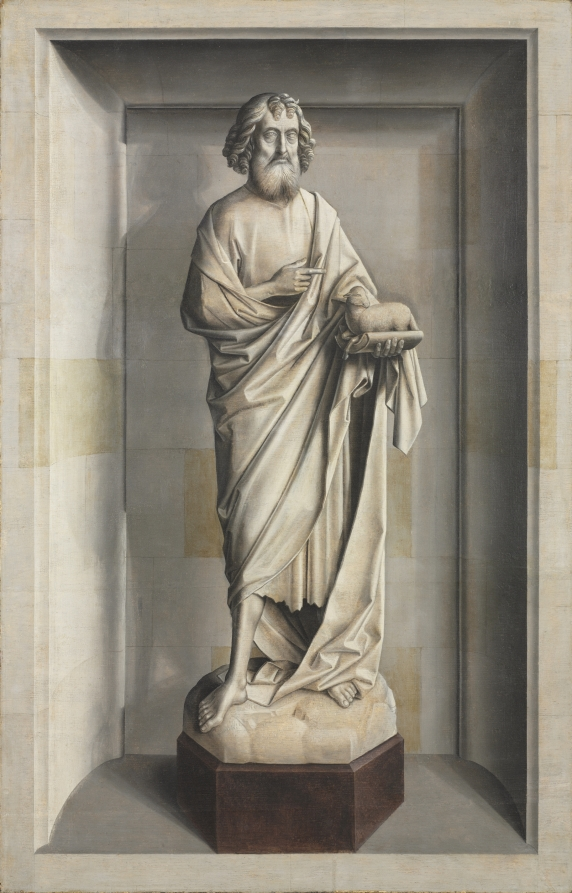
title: Saint John the Baptist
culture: Netherlands, Leuven, 15th century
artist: circle of Dieric Bouts (Netherlandish, 1415–1475)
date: c. 1475–85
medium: oil on wood (grisaille)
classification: Painting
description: This panel once formed part of an altarpiece painted for the Church of Saint Laurentius in Cologne. It originally comprised the reverse of the arrest of Christ, now in the Alte Pinakothek in Munich. Another grisaille panel representing Saint John the Evangelist, also in Munich, formed the exterior of the resurrection. The grisaille technique was a monochromatic method utilizing various shades of gray, often in imitation of sculpture, as is the case here. The illusionistic effect suggests a sculpture not set back in a niche, but clearly separated from it to enhance the three-dimensional appearance. Dieric Bouts was born in Haarlem in Holland, but was mainly active in Leuven in the South Netherlands where he was the city painter from 1468. This painting appears to be the work of a close follower.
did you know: Paintings like this one that are designed to trick the eye are known as trompe-l'œil.